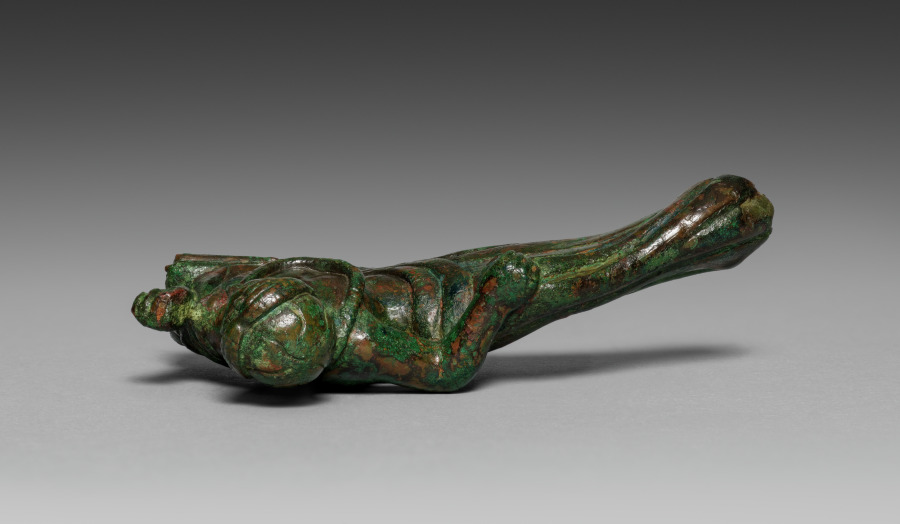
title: Vessel Ornament of Banqueter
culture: Etruscan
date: probably 400–375 BCE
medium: bronze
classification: Sculpture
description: This bronze banqueter figurine was one of six once adorning the rim of a large basin, now lost. Cast in molds with individualized details, most have grooves on their underside to attach to the basin. Minute traces of gilding remain on areas of clothing and skin (mostly visible only under magnification), suggesting that they may have been completely gilded. Two handles in the form of hippocampi, horses with serpentine tails, also belonged to the basin and are now displayed at the Michael C. Carlos Museum at Emory University. The basin may have been used to hold liquid for a banquet, or was perhaps funerary. This banqueter tilts his head toward his left hand, which may have once held an object, now lost. His right arm rests on his hip. Unlike the other banqueters, this figurine does not have exposed feet and his body curves slightly when viewed from above. This suggests that this figurine may have been made for a different initial use before being added to this set.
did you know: The Etruscan banquet shared similarities with the Greek symposium where guests reclined and drank wine.